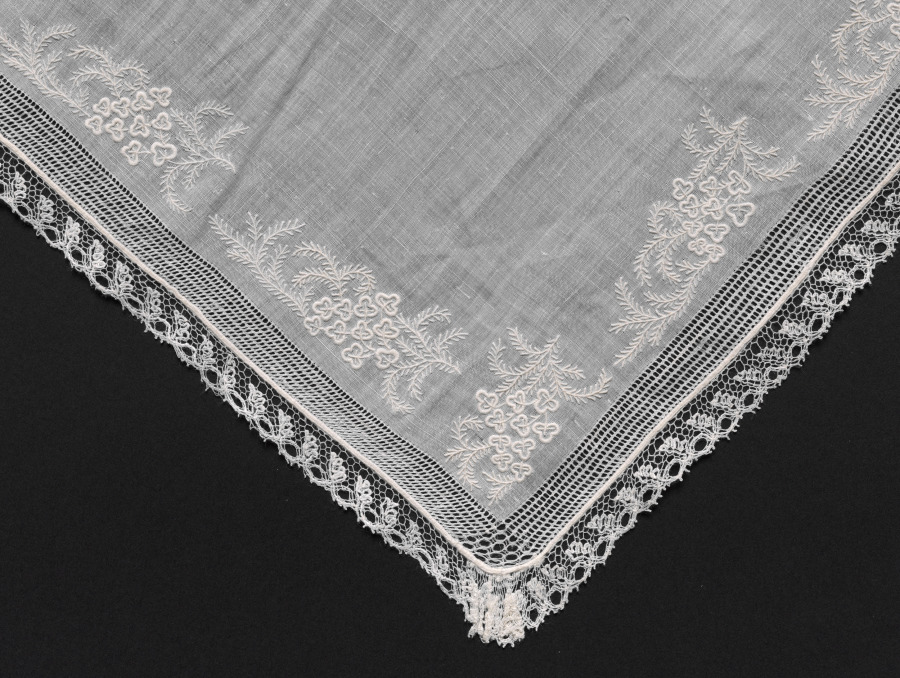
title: Lace Handkerchief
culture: France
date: 1800–1820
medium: Plain weave linen ground: needle lace (drawnwork) border, bobbin lace edging, and embroidery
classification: Embroidery